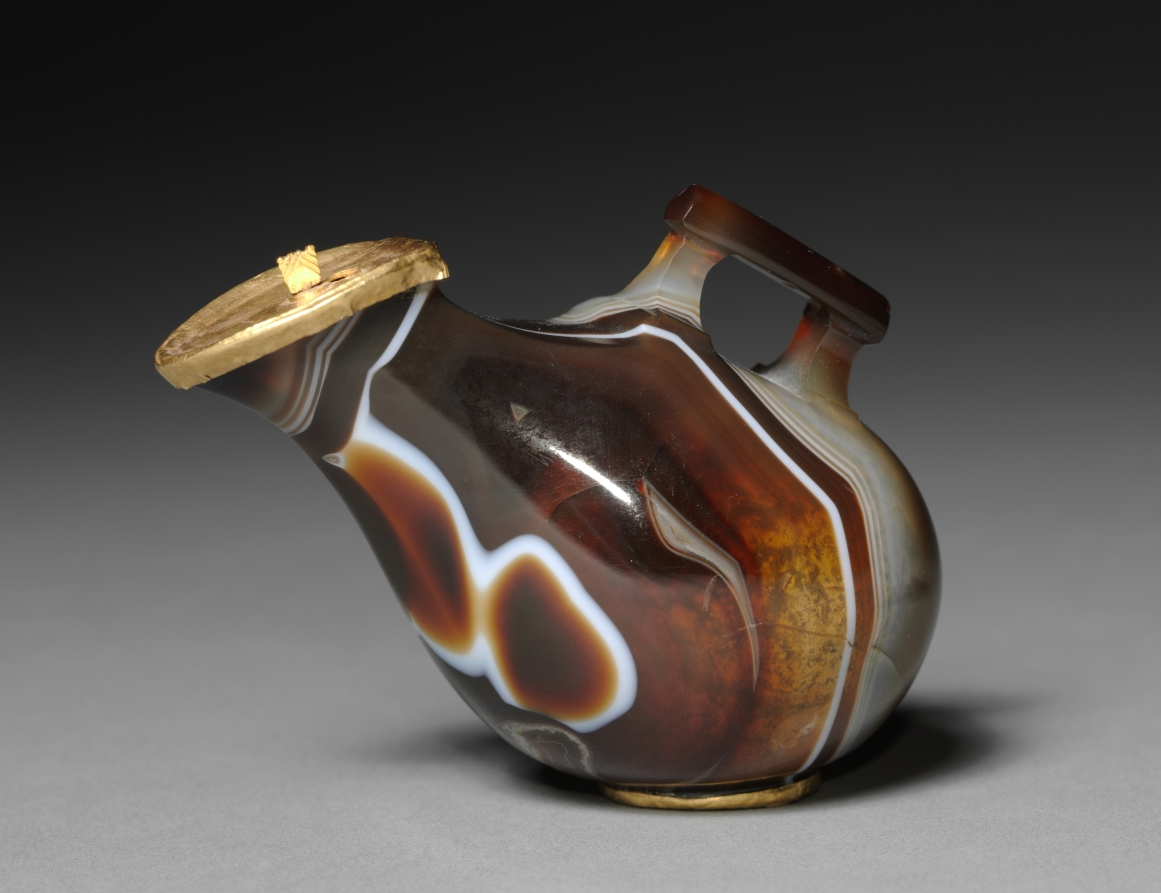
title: Askos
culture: Greece, Ptolemaic Dynasty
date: 200–1 BCE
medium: agate and gold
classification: Cosmetic Objects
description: This miniature vessel was carved from a single piece of banded agate, polished to a shine, and embellished with a gold lid and gold details on the base. Inside the ring of gold at the base is a trio of gold papyrus stalks, a likely reference to Egypt. In shape, it resembles an ancient wineskin, or askos, though its small size suggests use for luxury perfumes or oils. A tiny crab, likely once inlaid with a precious material, has been carved behind the handle.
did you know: The knob on the lid connects to a hidden disk to control the flow of liquid.